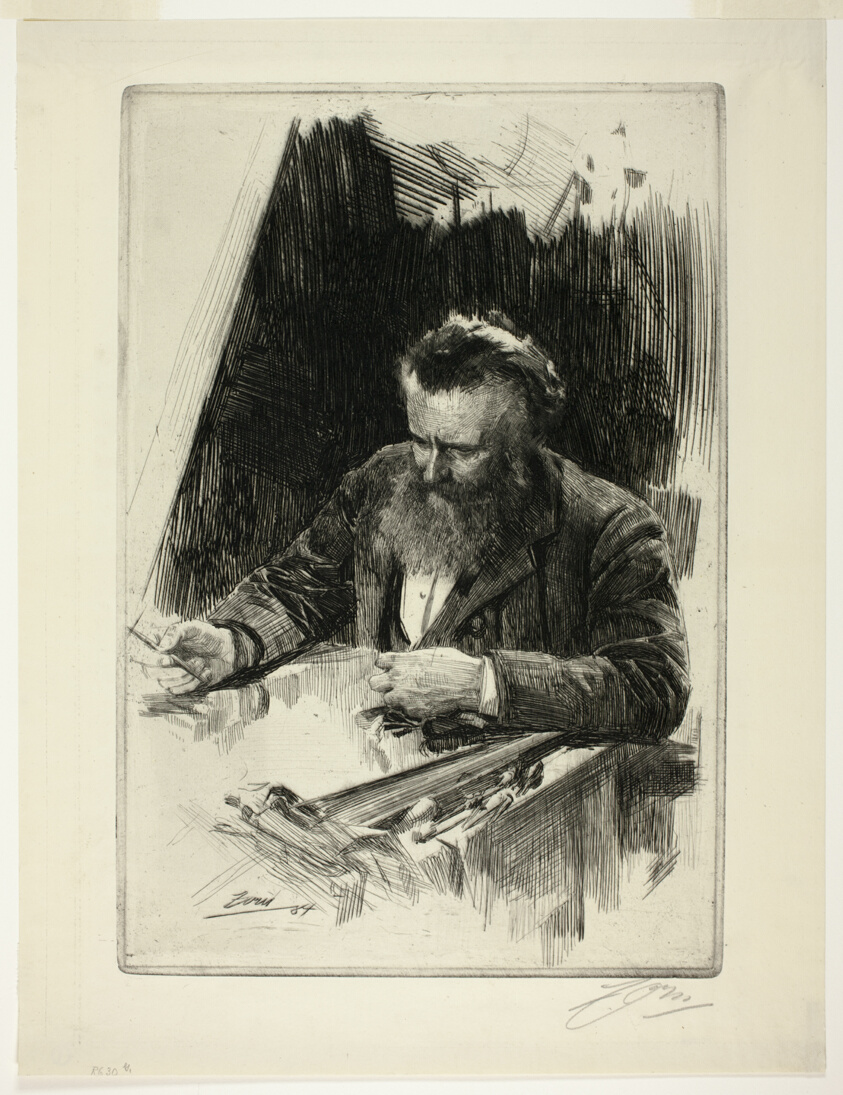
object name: Print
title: Axel Herman Haig III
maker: Anders Zorn (Swedish, 1860-1920)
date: 1884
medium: Etching on ivory laid paper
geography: Sweden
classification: etching; print; prints and drawing